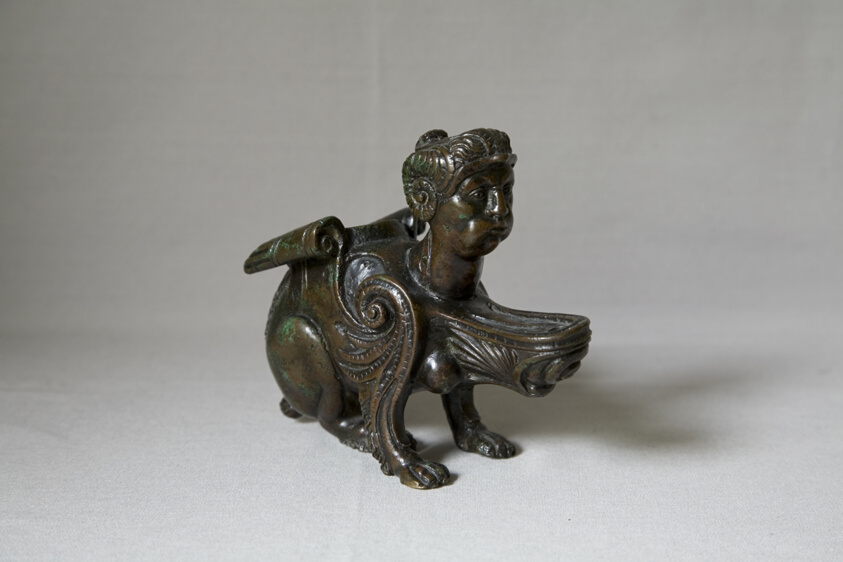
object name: Sculpture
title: Oil Lamp in the Form of a Sphinx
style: sixteenth century, 16th Century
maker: Follower of Andrea Riccio (Andrea Briosco; Italian, 1470–1532)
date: Cast c. 1525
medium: Bronze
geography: Italy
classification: functional object; sculpture; bronze; Italian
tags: sphinxes, mythical, mythological figures, mythology